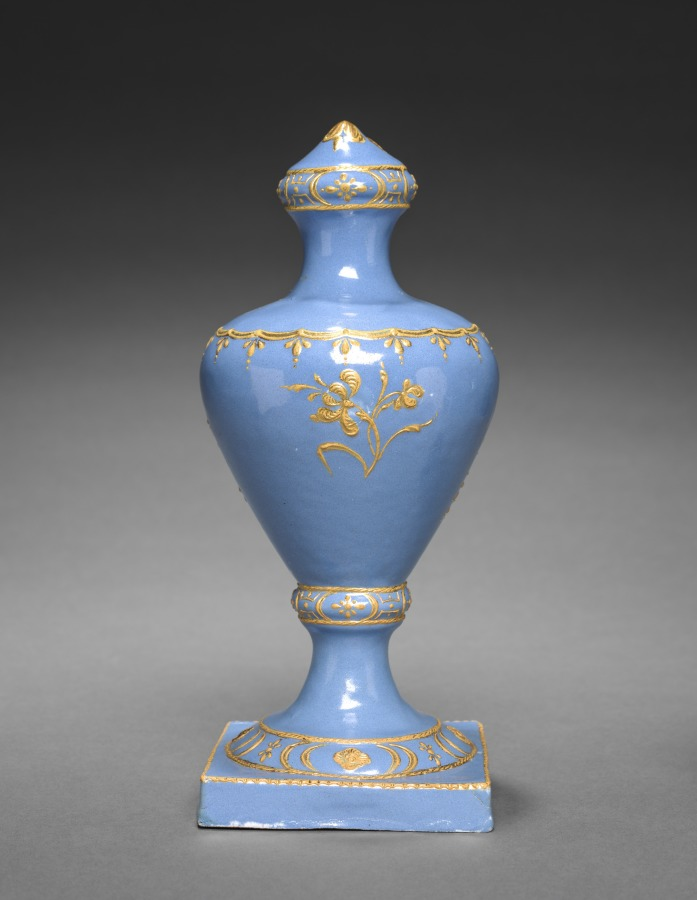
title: Urn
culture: England, South Staffordshire, 18th century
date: c. 1770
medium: enamel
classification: Enamel